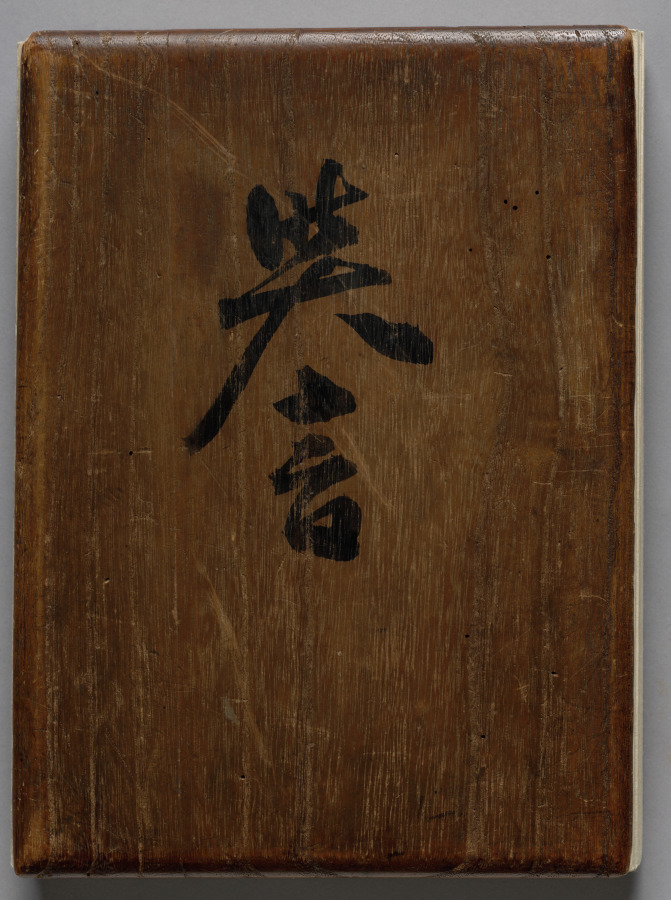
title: Album of Actor Portraits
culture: Japan, Edo period (1615–1868)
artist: Shōrakusai (Japanese)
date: c. 1790–1810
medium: accordion-style album; ink and color on silk mounted on paper and ink on paper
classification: Bound Volume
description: The paintings in this album show Kabuki actors costumed for their roles in a variety of plays. The characters are identified in the paper cartouches affixed to the paintings. While each painting is on silk that has been pasted into the album, the poems on some of the facing pages have been written in ink directly onto the page.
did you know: This album contains paintings of Kabuki actors who performed in the city of Osaka.